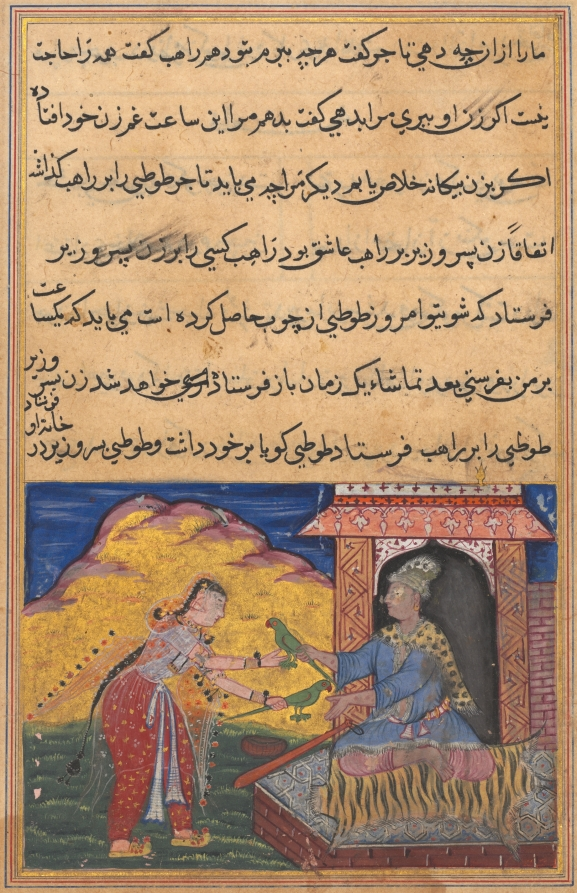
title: The wife of the son of the vizier brings the magic wooden parrot to her lover, the monk, who exchanges it for the replica, from a Tuti-nama (Tales of a Parrot): Tenth Night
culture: Mughal India, court of Akbar (reigned 1556–1605)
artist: Lalu (Indian, active mid-1500s)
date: c. 1560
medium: gum tempera, ink, and gold on paper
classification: Painting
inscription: lālū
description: The wife of the vizier’s son is having an affair with the monk, who is seated on tiger skins and wearing the blue robes of a dervish. Because he is a charlatan, he is able to recognize the deception taking place.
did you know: The replica parrot is denoted by its lack of pupils.